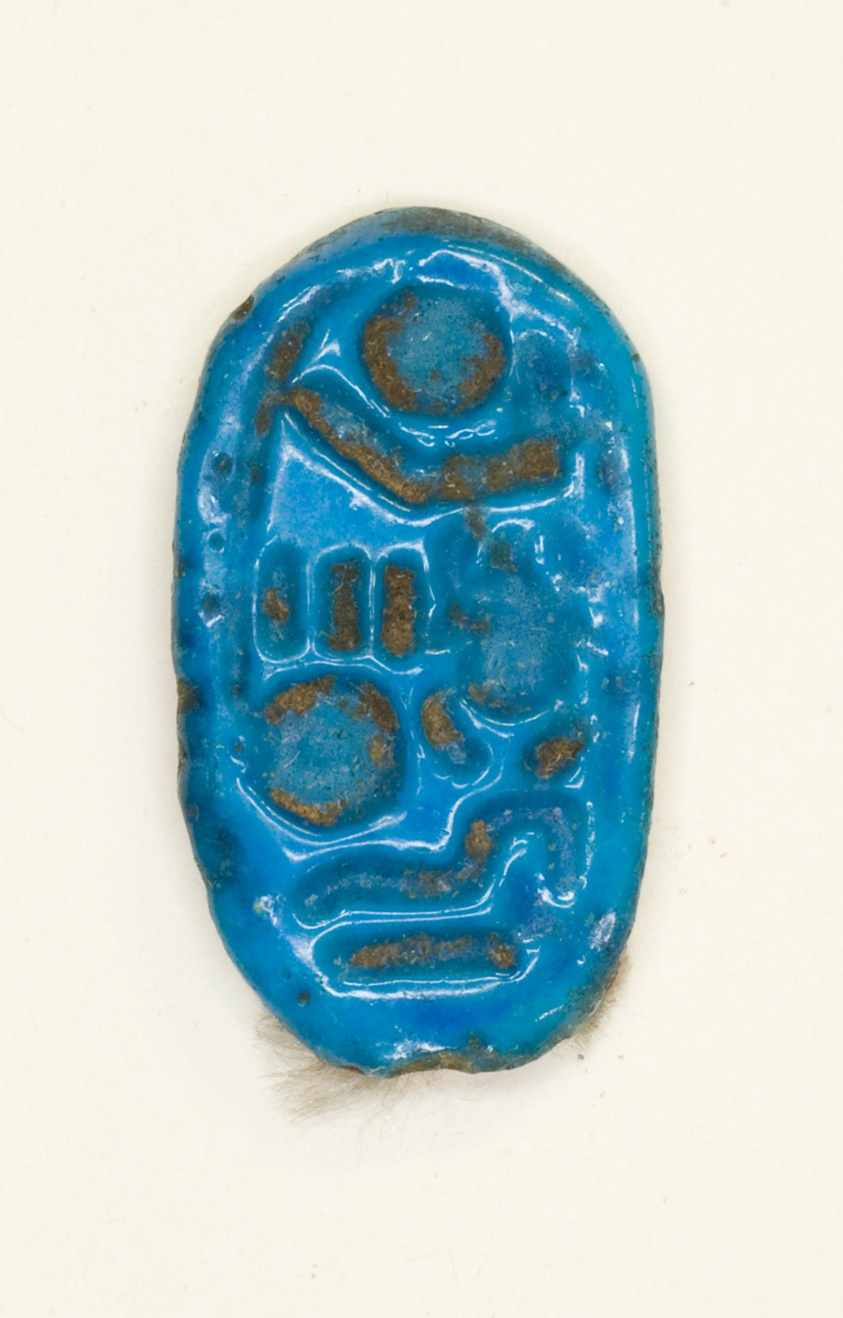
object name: Costume and Accessories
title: Ring: Djeserkheprure-Setepenre (Horemheb)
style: eighteenth dynasty, new kingdom, egyptian, ancient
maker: Egyptian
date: New Kingdom, Dynasty 18, reign of Horemheb (about 1323–1295 BCE)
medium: Faience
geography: Egypt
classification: ring (jewelry); ceramics; jewelry; ancient art; costume; faïence (composite material)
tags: Hieroglyphs